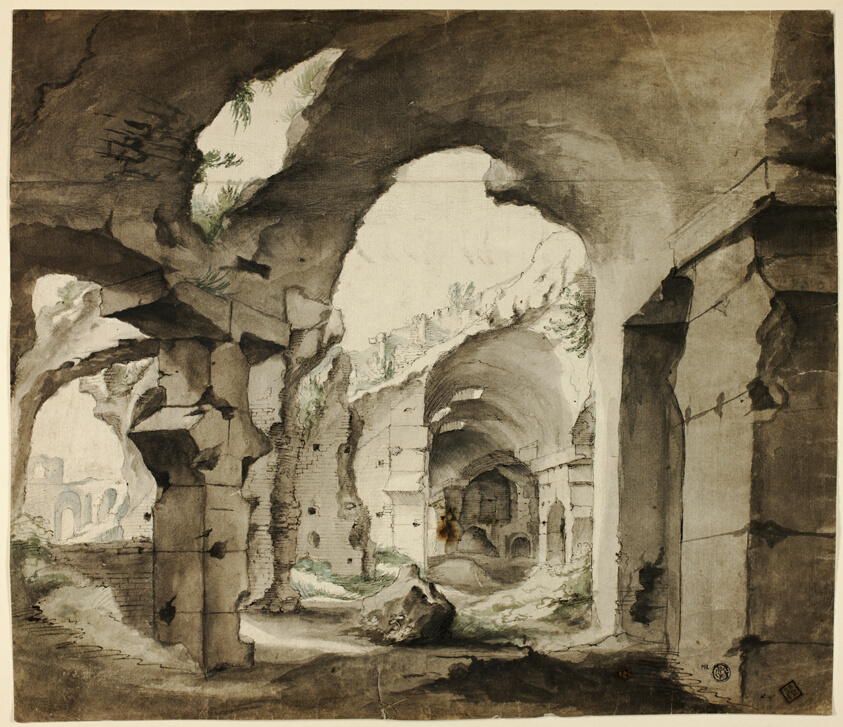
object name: Drawing and Watercolor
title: Interior View of the Coliseum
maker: Attributed to Lodewijk Toeput; Flemish, c. 1550–c. 1605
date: c. 1580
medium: Pen and brown ink and brush and black and green washes, over black chalk, on cream laid paper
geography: Flanders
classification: ink or chalk wash; drawings (visual works); prints and drawing